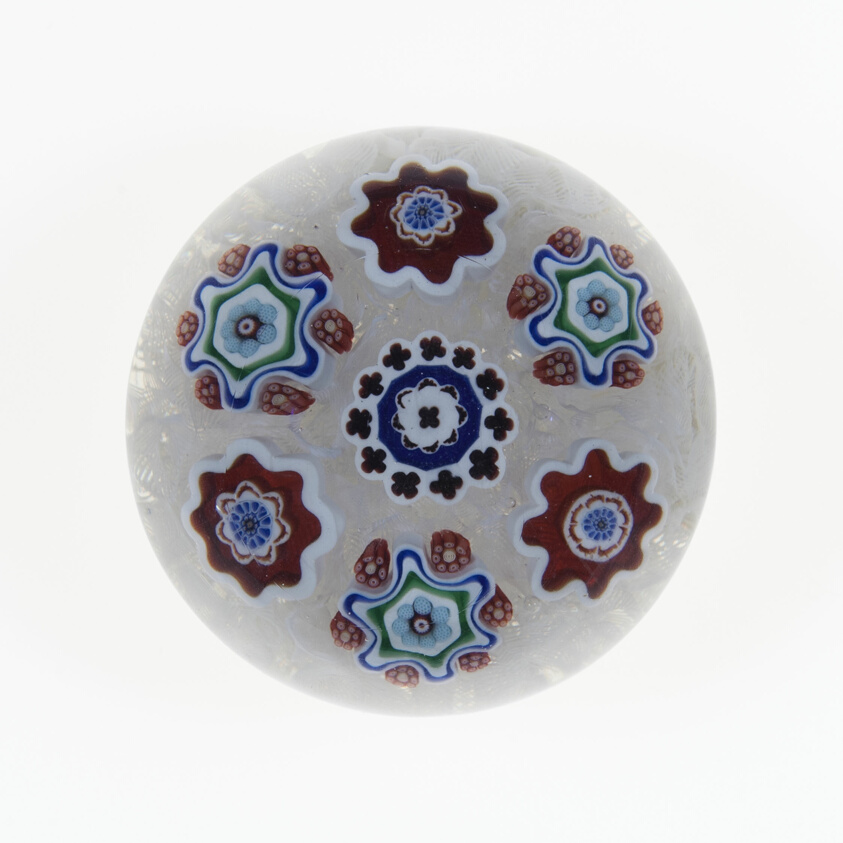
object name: Glass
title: Paperweight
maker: Baccarat Glassworks (Cristalleries de Baccarat); Lorraine, France, founded 1764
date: c. 1846–55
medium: Glass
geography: Lunéville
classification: paperweight; millefiori; european decorative arts; glass